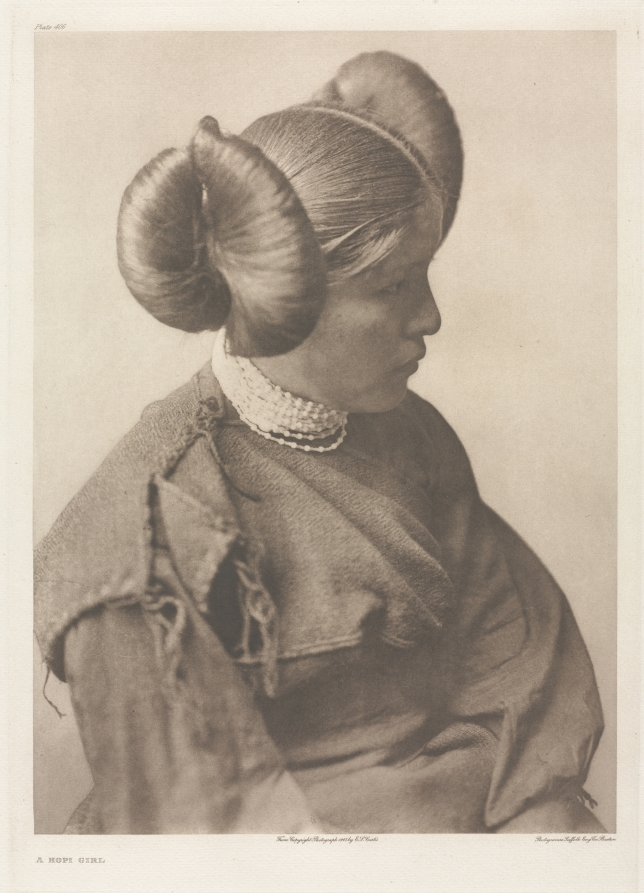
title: Portfolio XII, Plate 406: A Hopi Girl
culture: America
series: The North American Indian: being a series of Portfolios picturing and describing the Indians of the United States, the Dominion of Canada, and Alaska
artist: Edward S. Curtis (American, 1868–1952)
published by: The University Press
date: 1905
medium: photogravure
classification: Portfolio